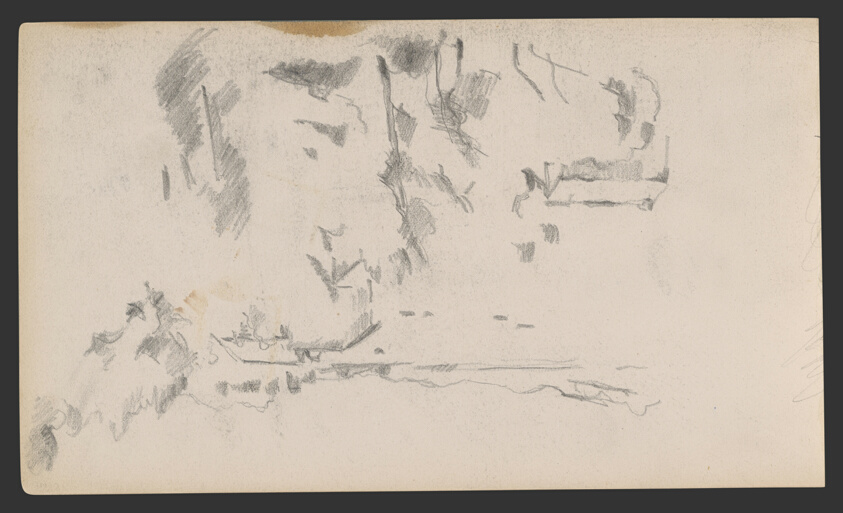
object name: Drawing and Watercolor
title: Sketchbook No. 2 (L'Estaque)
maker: Paul Cézanne; French, 1839-1906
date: 1875–86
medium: Graphite and pen and ink drawings on paper, bound into a book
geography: France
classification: sketchbook; graphite; prints and drawing; paper